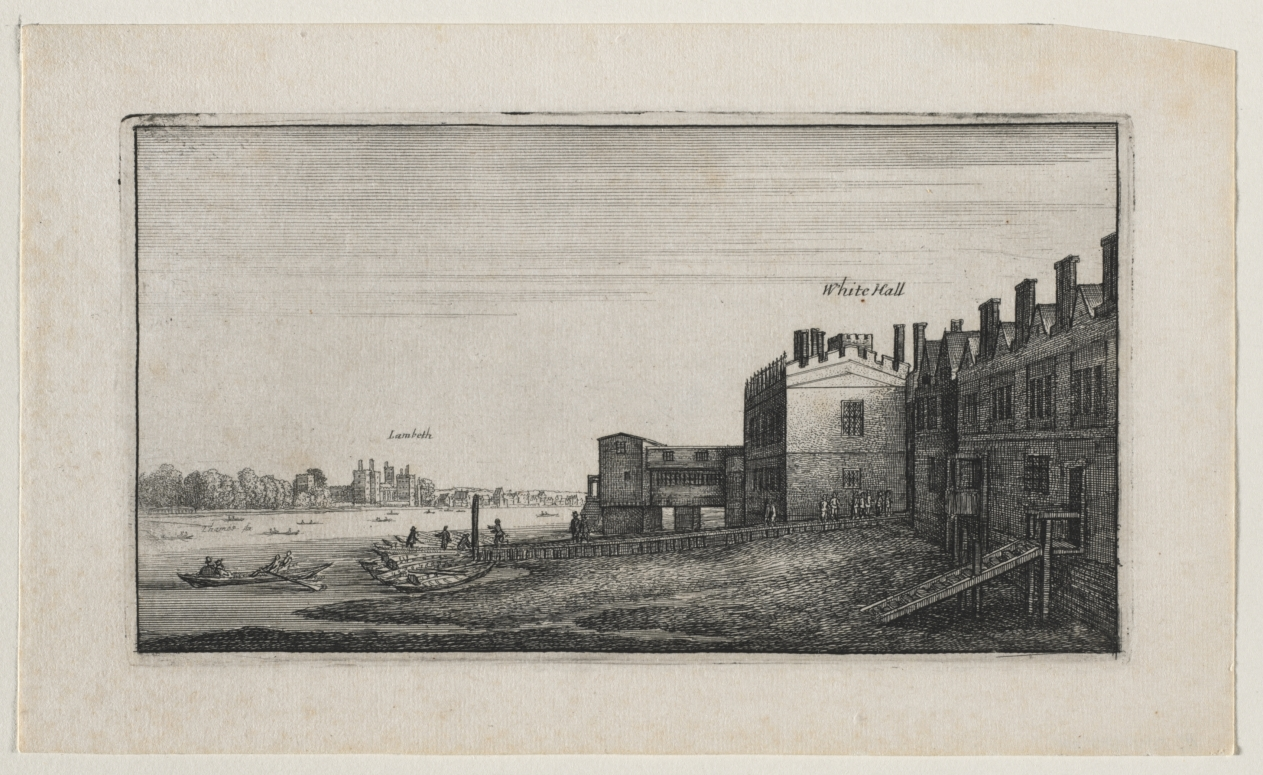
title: Whitehall from the River, with Lambeth in the Distance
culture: Bohemia, 17th century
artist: Wenceslaus Hollar (Bohemian, 1607–1677)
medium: etching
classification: Print